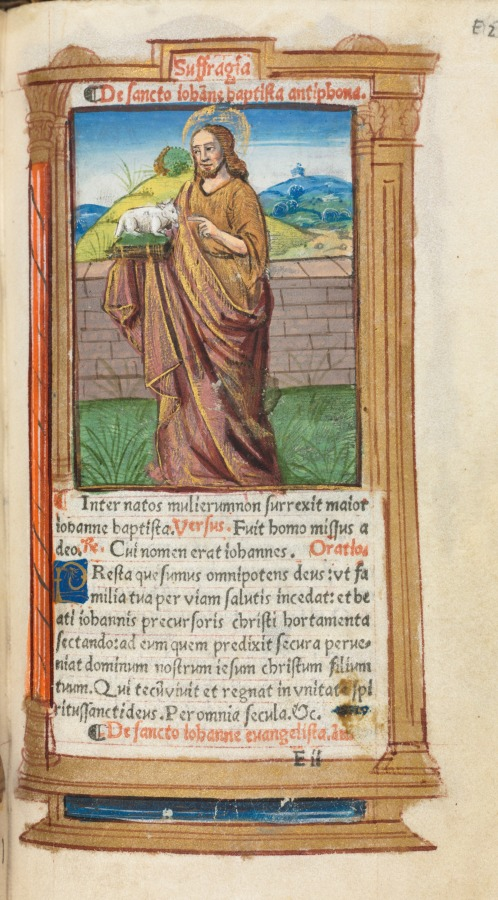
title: Printed Book of Hours (Use of Rome): fol. 98r, St. John the Baptist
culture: France, Paris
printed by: Guillaume Le Rouge (French, Paris, active 1493–1517)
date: 1510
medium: 112 Printed folios on parchment, bound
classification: Bound Volume